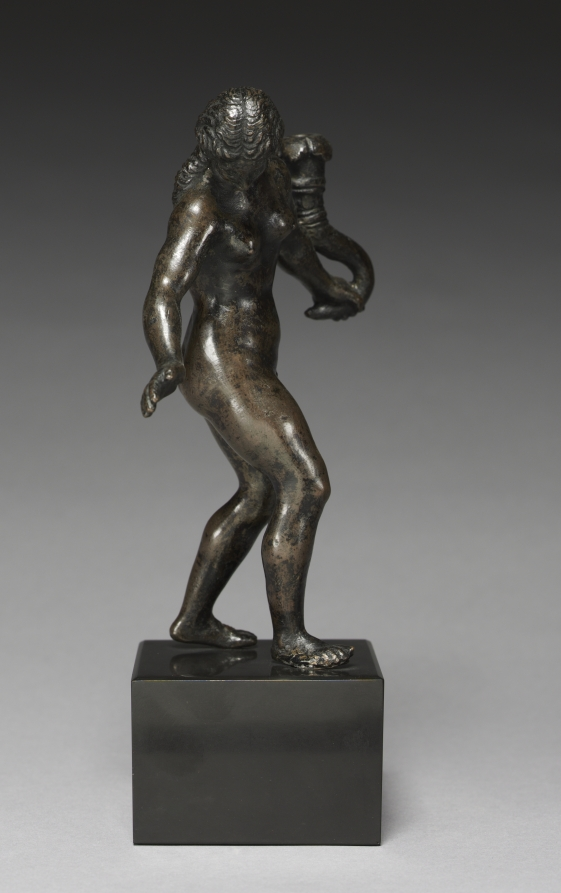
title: Woman with a Cornucopia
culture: Italy, 16th century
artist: Severo da Ravenna (Italian, c.1496–c.1543)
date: c. 1525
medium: bronze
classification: Sculpture